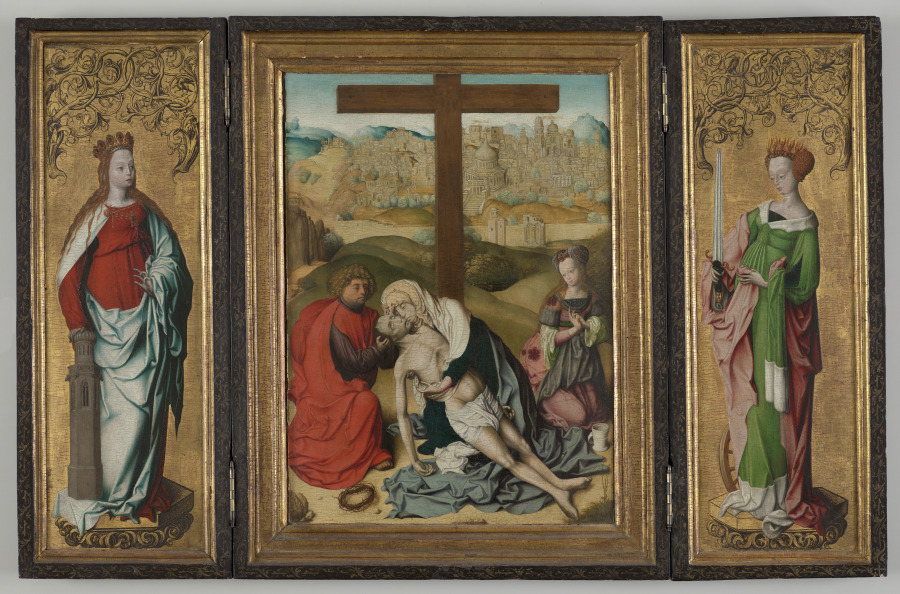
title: Triptych with The Lamentation of Christ (center), St. Barbara (left wing), St. Catherine of Alexandria (right wing), The Annunciation (reverse wings)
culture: Austria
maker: Master of the Krainburg Altar (Austrian, active c. 1485–1510)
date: c. 1500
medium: Center: oil on poplar; Wings: oil and gold leaf on poplar panel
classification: Painting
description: The triptych shows an exact representation of Jerusalem. The model is a woodcut by Erhard Reuwich for the publication Pilgrimage to the Holy Land, by Bernhard von Breydenbach, published in Mainz in 1486. This book became a bestseller, reprinted thirteen times over the next three decades. The painter who was active in today’s Slovenia around 1500 adapted this for his depiction of the Lamentation of Christ.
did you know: The Master of Krainburg was active in the area of today's Slovenia and should therefore be called the Master of Kranj in Slovenian.